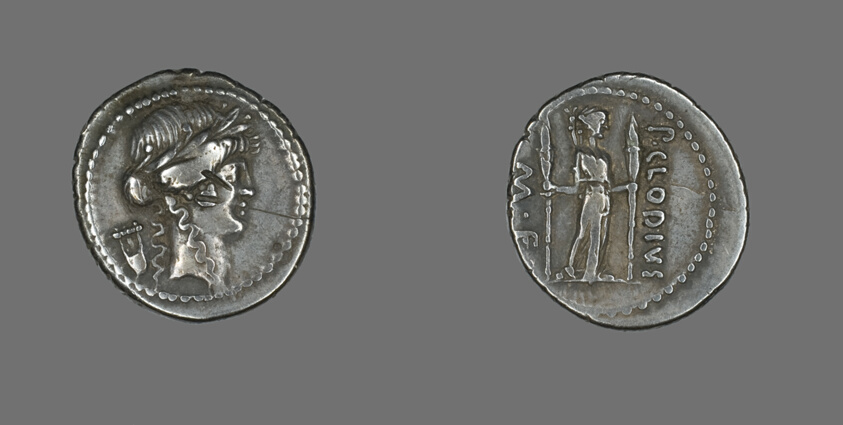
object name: Coin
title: Denarius (Coin) Depicting the God Apollo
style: roman (ancient, style or period)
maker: Roman, minted in Rome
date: about 42 BCE, issued by P. Clodius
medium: Silver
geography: Roman Empire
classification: coin; ancient art